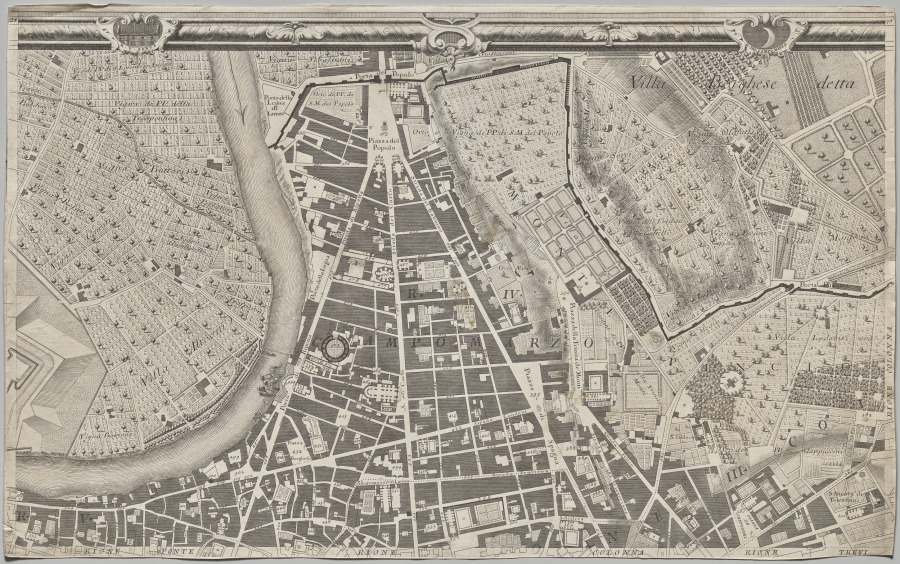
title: Nuova pianta di Roma data in luce da Giambattista Nolli l’anno MDCCXLVII, known as La Pianta Grande di Roma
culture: Italy, 18th century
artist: Giovanni Battista Nolli (Italian, 1701–1756)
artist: Carlo Nolli (Italian, 1690–1790)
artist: Rocco Pozzi (Italian, 1701–1774)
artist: Pietro Campana de Soriano (Italian, 1725–c. 1779)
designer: Stefano Pozzi (Italian, 1699–1768)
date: 1748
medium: etching and engraving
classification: Print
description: The monumental Pianta Grande di Roma, or Large Plan of Rome, which measures about 5 x 7 feet when its twelve plates are assembled, is a landmark in both cartography and printmaking. The map is considered the first scientific rendering of Rome, establishing new standards of accuracy and thoroughness when it was published in 1748. Devised by the Lombard architect and surveyor Giovanni Battista Nolli (Italian, 1701-56), the creation of the map required over ten years of surveying the city carried out by Nolli and a team of assistants with the help of new measuring devices. In Nolli’s “ichnographic” (also called “ground”) plan, architectural features and the urban infrastructure are reduced to a single horizontal slice, a minutely detailed footprint that conveys dimensions, proportions, and orientations to scale with the utmost clarity.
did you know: To make this map, Pope Clement XII granted the mapmaker permission to measure courtyards and other interior, inaccessible spaces in monastic communities, even those in nuns’ convents, which was controversial at the time.